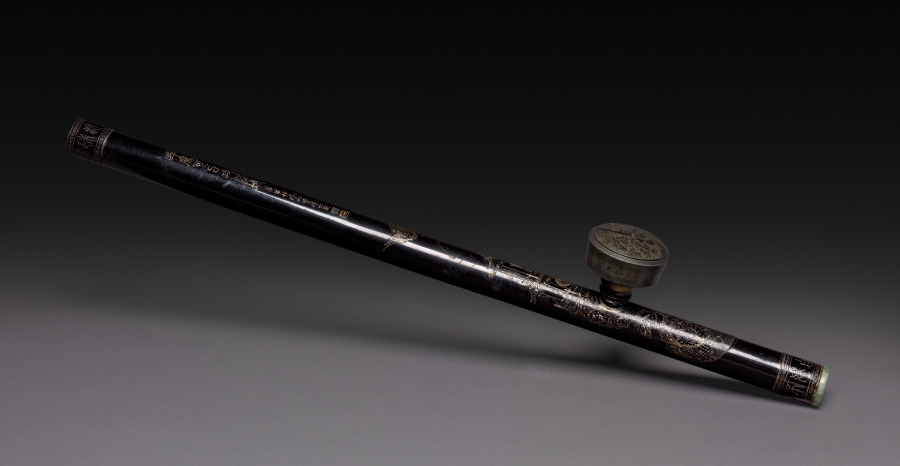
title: Opium Pipe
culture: China, Qing dynasty (1644-1911)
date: 1800s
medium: lacquer with silver and gold inlay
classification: Miscellaneous